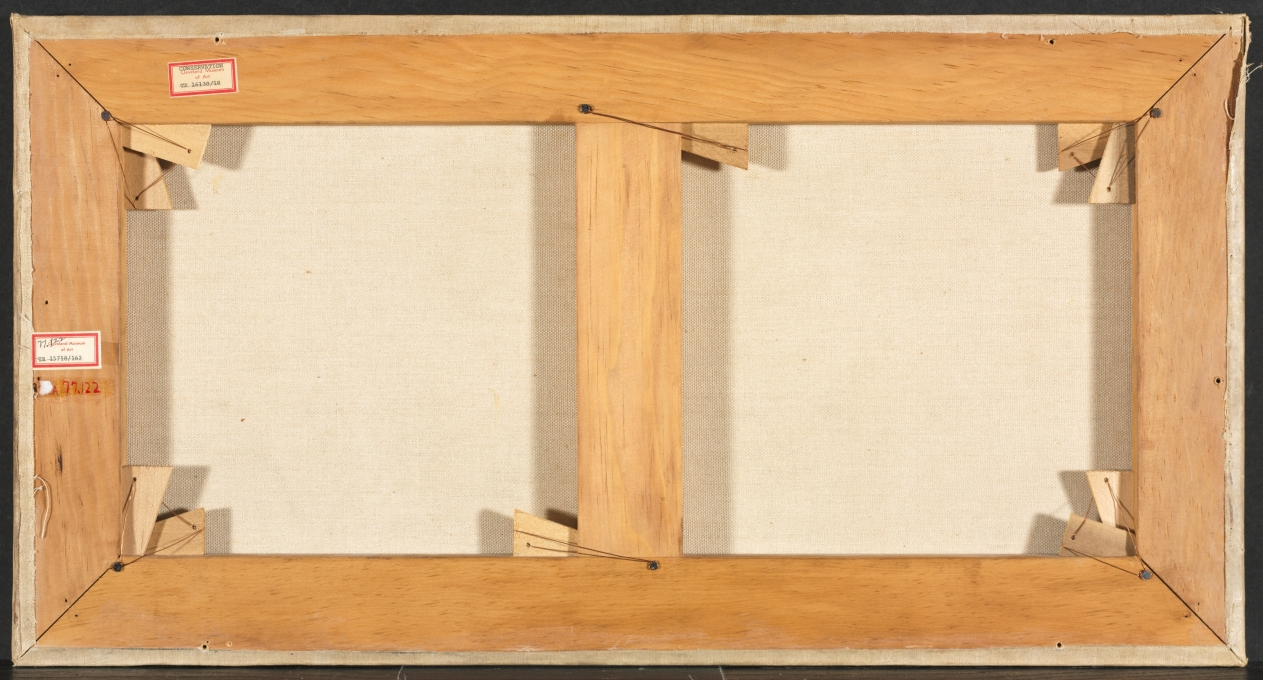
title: Village Festival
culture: Flanders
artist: David Teniers (Flemish, 1610–1690)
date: c. 1646–50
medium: oil on canvas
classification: Painting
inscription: Signed lower right: "D. TENIERS. FEC."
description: Depictions of peasant festivals, such as weddings, harvests, and village holidays became an extremely popular subject for Flemish artists during the 1600s. In his paintings of these festive occasions David Teniers the Younger (1610–1690), portrayed peasants dancing and playing music, focusing on the cheerful elements of peasant life. His images often feature close-knit family groups taking part in the celebration. Contrary to his predecessors, who often depicted broken and disorderly still life objects in their paintings, Teniers emphasized household objects in brass, ceramic, and glass in a perfect state to demonstrate the growing prosperity of the peasants.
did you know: Surviving drawings show that Teniers sketched many peasants from life, and similar figures appear throughout his peasant paintings from about 1640 to 1660.